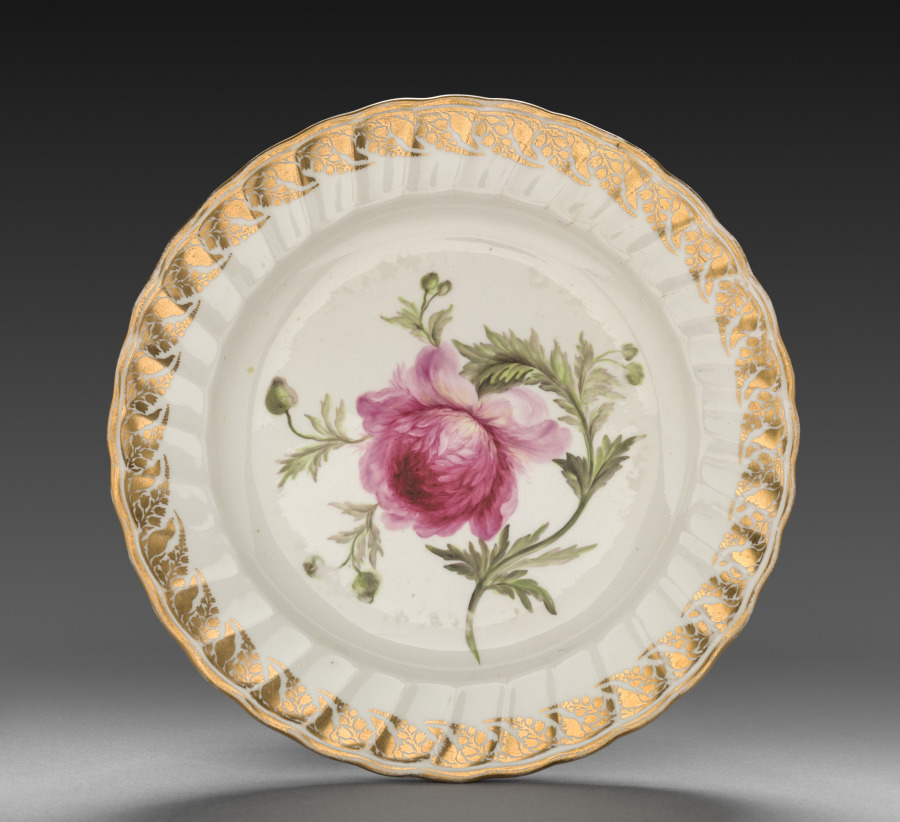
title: Plate from Dessert Service: Anemone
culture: England, Derby, 18th century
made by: Derby (Crown Derby Period) (British)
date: c. 1800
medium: porcelain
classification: Ceramic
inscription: inscribed in blue on back: Anemone./crown/crossed batons and dots/D/115. Near edge: 9.